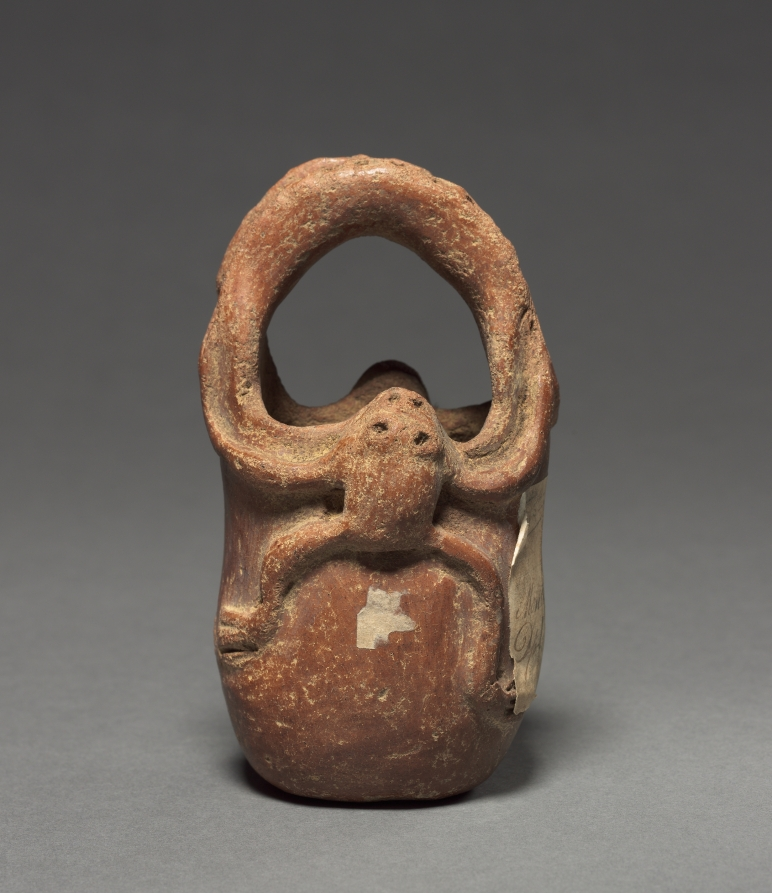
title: Jar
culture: Colombia, 19th-20th century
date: before 1921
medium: red ware with incised patterns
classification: Ceramic